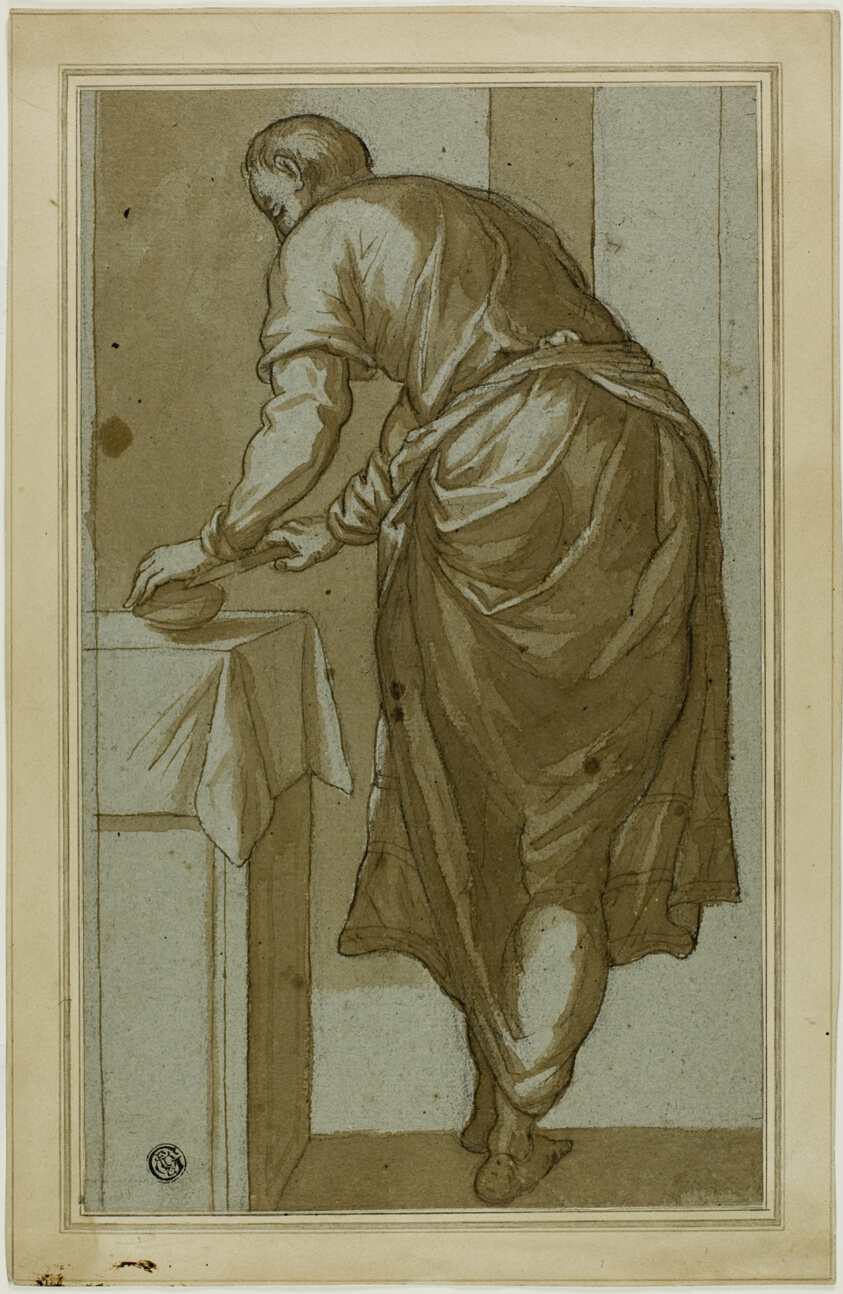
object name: Drawing and Watercolor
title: Standing Man Seen From Behind Cutting Bread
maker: After Jacopo Robusti, called Tintoretto; Italian, 1519-1594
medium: Pen and brown ink, with brush and brown wash, over black chalk, on blue-green laid paper, laid down on ivory laid paper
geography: Italy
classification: ink with wash; drawings (visual works); prints and drawing